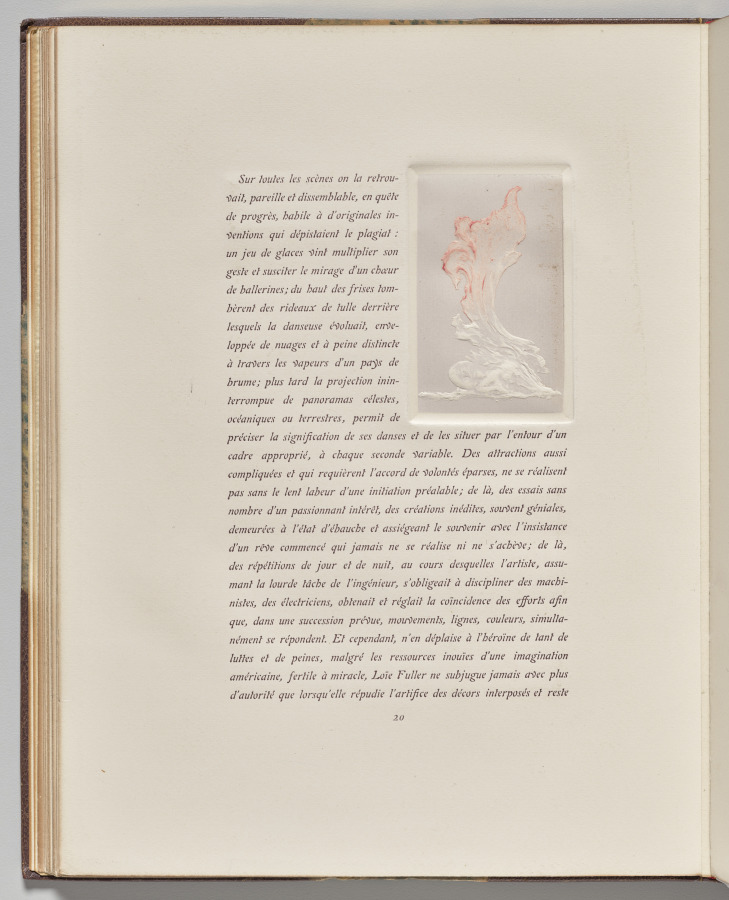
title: Dancing Woman in Kneeling Position Enveloped in Drapery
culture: France, early 20th Century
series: La Loïe Fuller, by Roger Marx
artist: Pierre Roche (French, 1855–1922)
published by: Les Cents Bibliophiles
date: 1904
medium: gypsograph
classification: Bound Volume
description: Although best known as a sculptor, Roche was a versatile and prolific artist who worked in many mediums. Loïe Fuller, the pioneer of modern dance who took Paris by storm in 1892, was one of his favorite subjects. He portrayed her in clay, bronze, marble, plaster, and in a series of gypsographs that illustrated an essay by the art critic Roger Marx. The book was described as "a precious monument to Loïe Fuller."